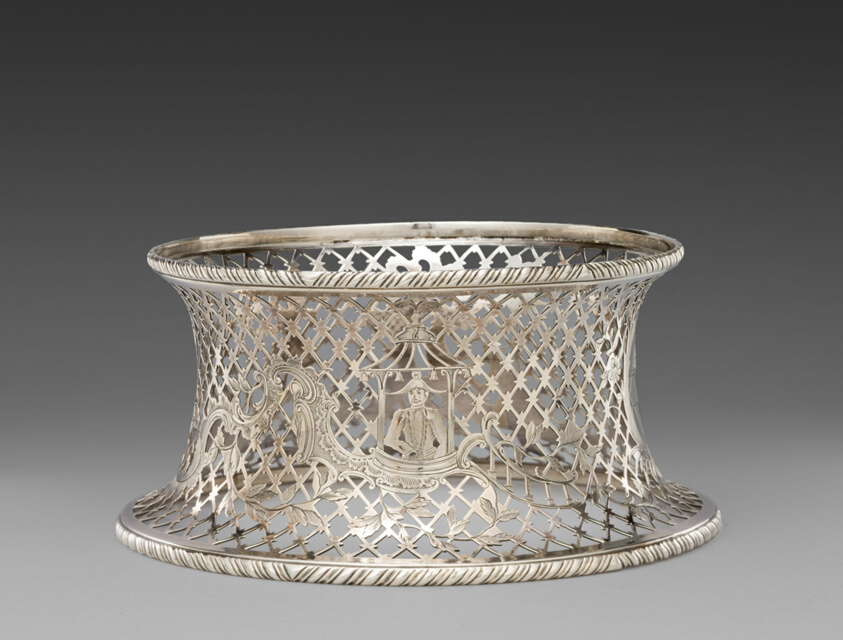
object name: Metalwork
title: Dish Ring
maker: Charles Townsend; Irish, active 1770-1785; Dublin, Ireland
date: 1772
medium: Silver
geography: Dublin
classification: tableware; metalwork